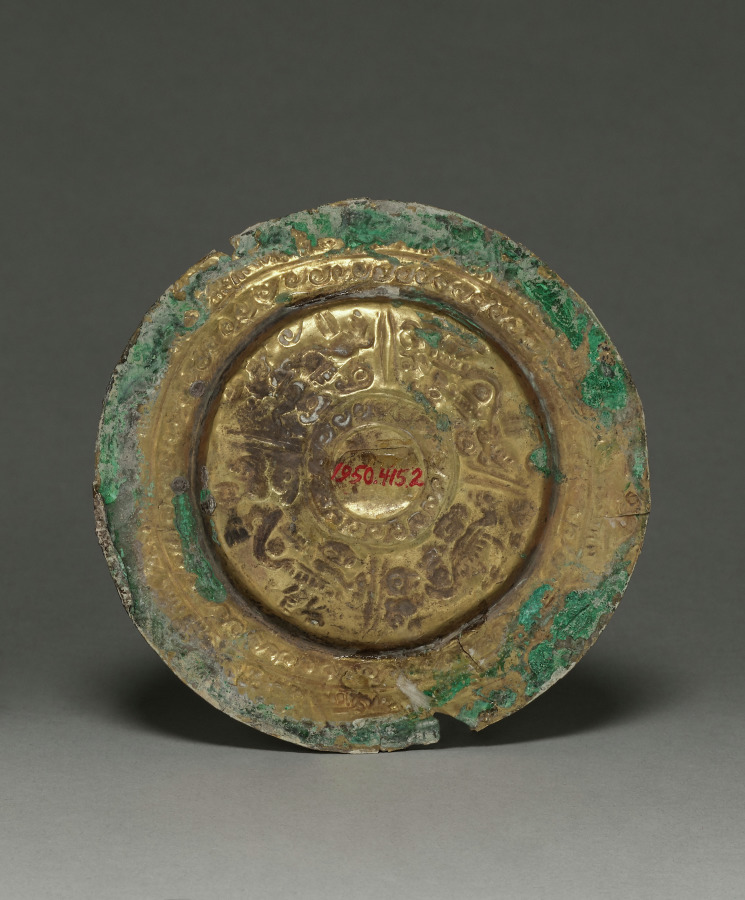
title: Ear Ornament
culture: Peru, North Coast, Sicán, 9th-14th century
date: c. 800–1370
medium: hammered and embossed gold alloy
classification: Metalwork